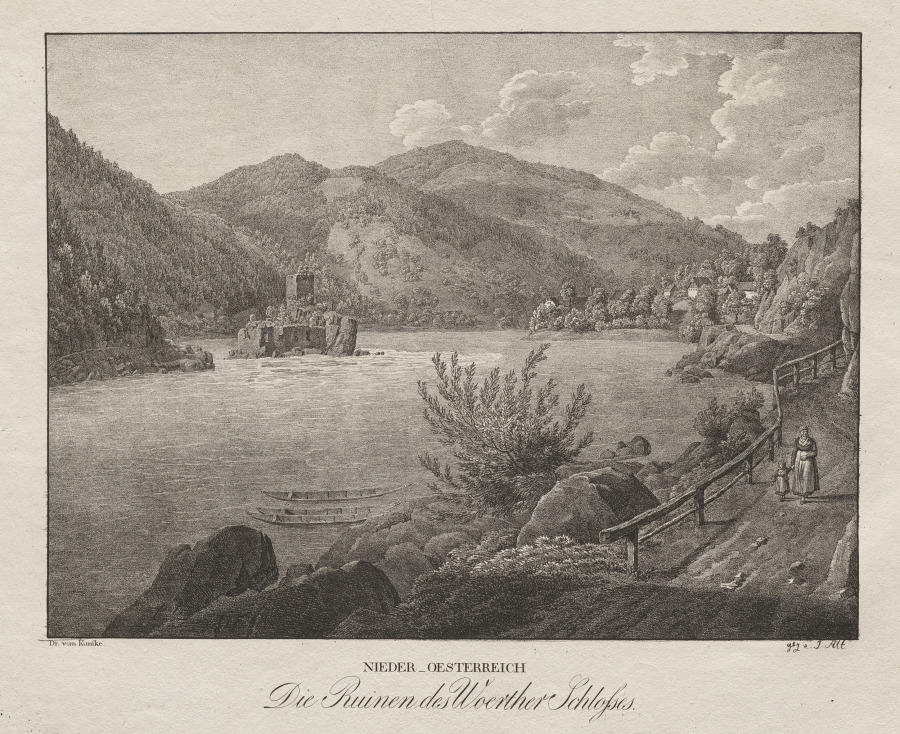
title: Nieder-oesterreich, Die Ruinen des Woerther Schlosses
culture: Austria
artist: Jakob Alt (Austrian, 1789–1872)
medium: lithograph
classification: Print